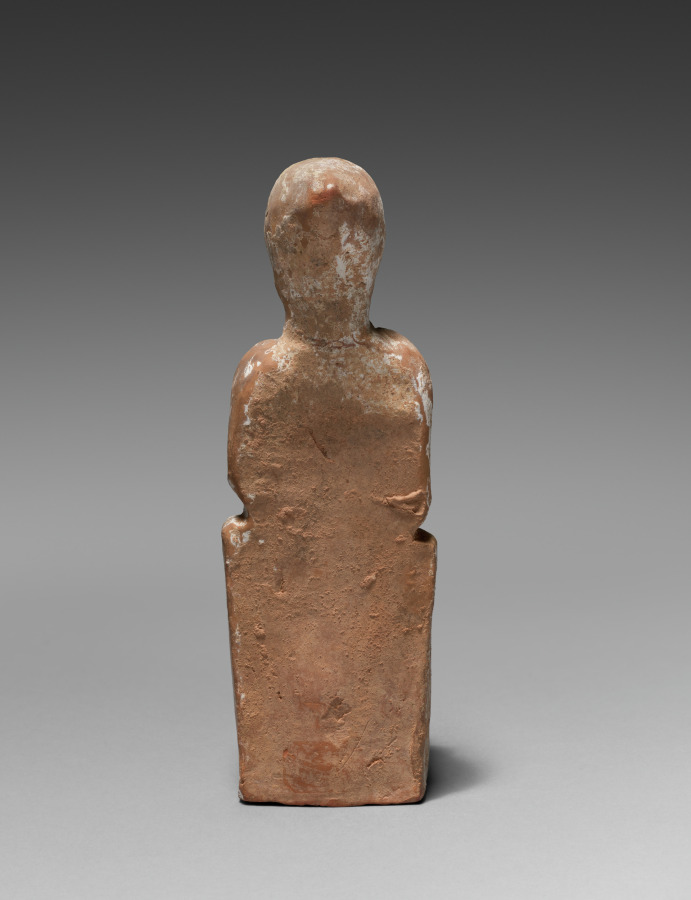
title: Archaic Figurine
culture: Greece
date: 500s BCE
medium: terracotta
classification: Sculpture